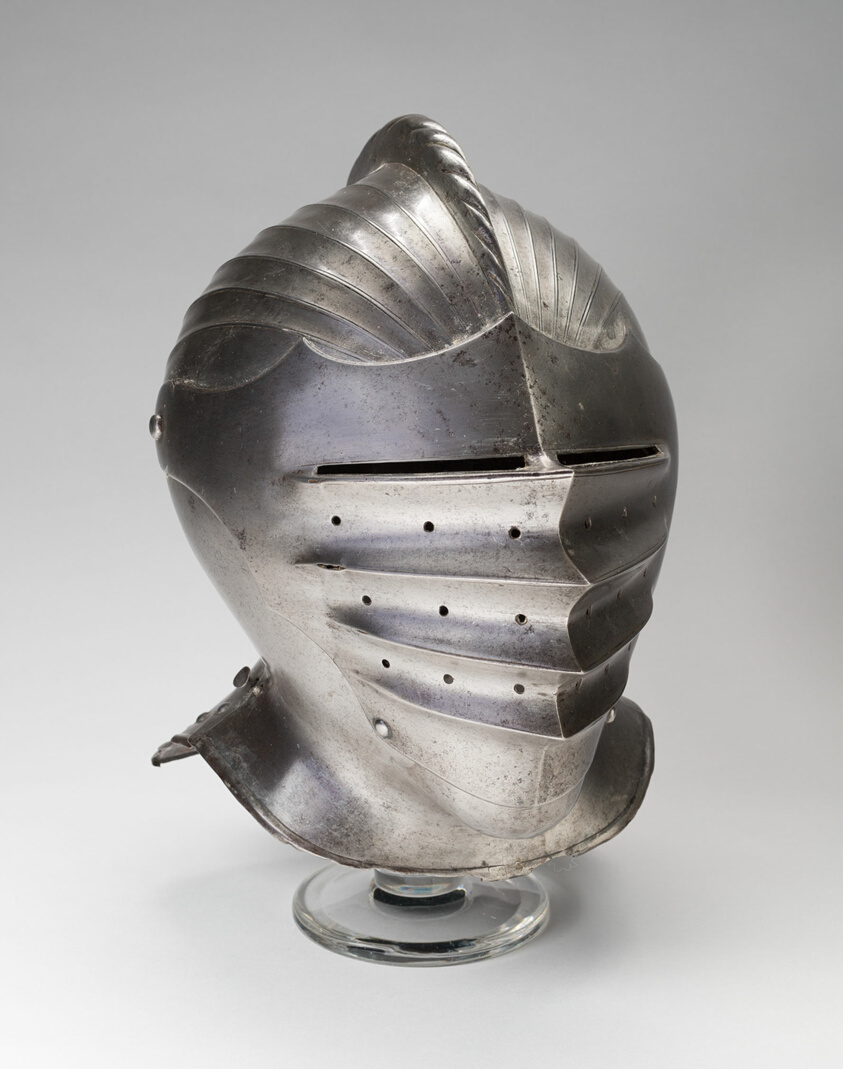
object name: Armor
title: Close Helmet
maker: South German, Probably Nuremberg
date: c. 1520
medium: Steel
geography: Nuremberg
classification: suit-helmet; armor; arms and armor